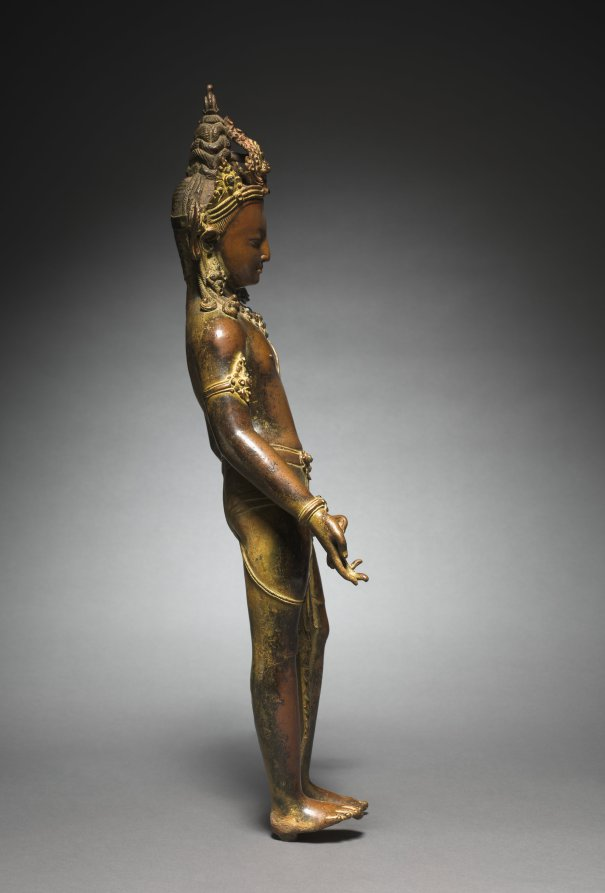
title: Avalokitesvara Padmapani: Bodhisattva of Mercy Bearing a Lotus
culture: Nepal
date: c. 1000s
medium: bronze with gilding, pigment, and semiprecious stones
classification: Sculpture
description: Venerated by Buddhists across the world as the perfect embodiment of compassion for all beings, this bodhisattva-a being only one stage away from complete enlightenment-holds his right hand out gently in the gesture of gift-giving. In his left hand, he once grasped the stem of a lotus flower that blossoms over his left shoulder, indicative of the abundant benefits that result from acts of loving kindness. All bodhisattvas wear royal garments and jewels, in reference to the historical Buddha’s early life as a prince, prior to his achievement of enlightenment through meditations in the forest. In the center of his crown is the tiny seated image of the meditating Buddha Amitabha that identifies this figure as Avalokitesvara specifically. Nepalese bronzes of the 11th century are solid cast and have an exceptionally high copper content in the alloy that makes the bronze difficult to manage during fabrication. The color achieved by the extra copper creates a distinctive warmth and softness in the sculpture. The flexed toes of the right foot and the swinging to one side of the gathered ends of his garment impart a sense of dynamism to his ongoing act of giving. His facial expression is sweet and placid but sharp, as though he is keenly aware of the sufferings of the world.